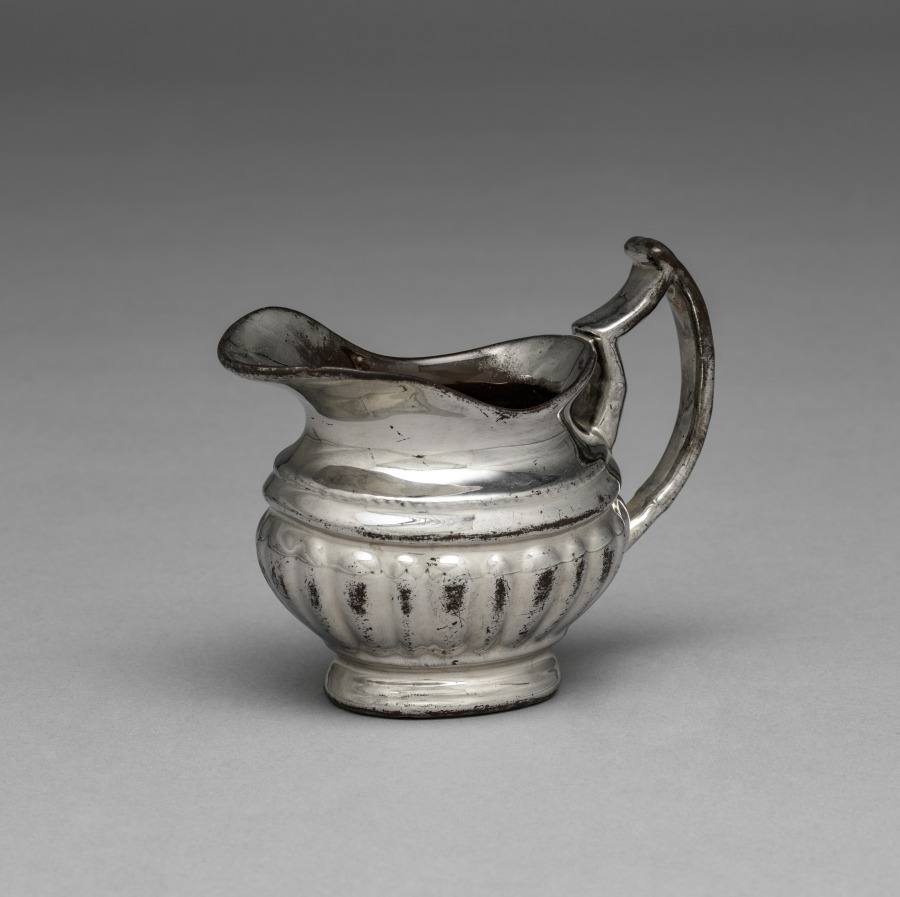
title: Silver Lustre Creamer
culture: England, 19th century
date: 1800s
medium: lustreware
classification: Ceramic